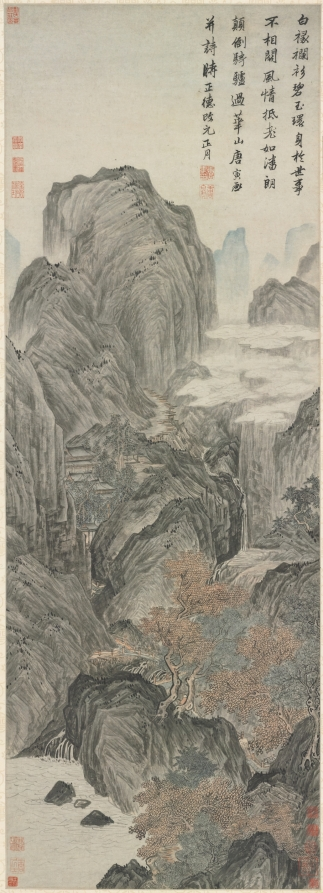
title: Mount Hua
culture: China, Ming dynasty (1368–1644)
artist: Tang Yin (Chinese, 1470–1523)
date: 1506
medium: hanging scroll; ink and light color on paper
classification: Painting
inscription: Artist's inscription, signature, and 4 seals: Wearing a white-bordered scholar's robe and green jade pendants, His life is unconcerned with worldly fame. Like P'an Lang resisting old age through high spirits, Crazy and clumsy he rides his donkey past Mount Hua. T'ang Yin painted this and composed the poem, the first month of the year of the Cheng-te era [1506]. [2 seals] T'ang Tzu-wei yin; T'ang. [2 seals, lower left corner] Po-hu T'ang Yin ssu yin; T'ang Chü-shih. trans. LYSL 12 additional seals: 2 of Wang Shan (1645-1728); 5 of Liu Shu (1759-1816); 1 of Yeh Ao (19th c.); 1 label and 2 seals of Lu Hui (1851-1920); 2 seals unidentified.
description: In this work, Tang Yin accumulates towering mountain summits in the manner of the Sung master, Li Tang, to capture the monumental presence of his subject. Tang Yin’s angular brushstrokes and ink washes of varied intensity give texture to the rocky surface and accent the play of light. Mount Hua is situated in southern Shaanxi province in North China. Hardly accessible during Tang Yin’s time, the mountains were frequented by immortality seekers to dwell or collect herbal drugs there. Tang Yin's potentially brilliant career was shattered in 1499 after he went to the capital to take the jinshi examination. He got entangled in a bribery case that caused him to spend seven years in prison. After his release, Tang returned to Suzhou, and settled on a career as a professional painter. One of Tang's few dated works, Mount Hua was painted seven years after this incident.